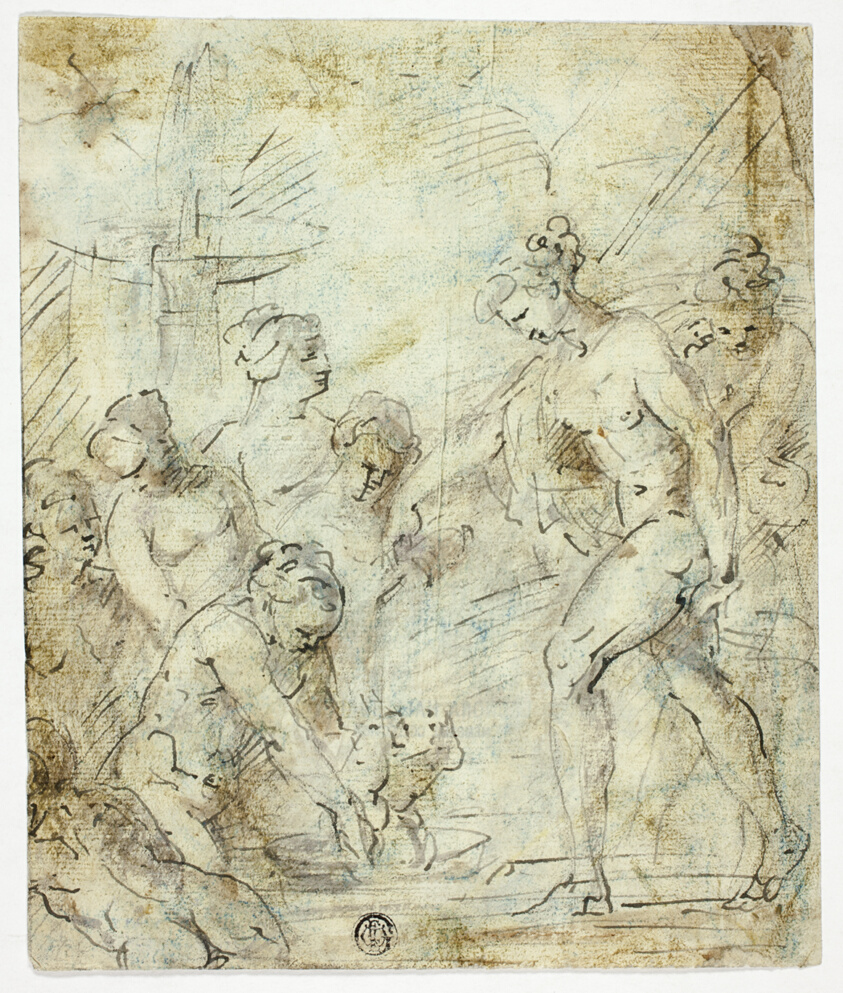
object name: Drawing and Watercolor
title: Mercury Entrusting Infant Bacchus to Nymphs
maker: Style of François Boitard (French, c. 1670-c. 1715)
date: 1690/1715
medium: Pen and gray brown ink, with brush and gray wash, with additions of blue and green pastel, on pale green tinted paper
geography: France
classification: pen and ink drawings; drawings (visual works); prints and drawing